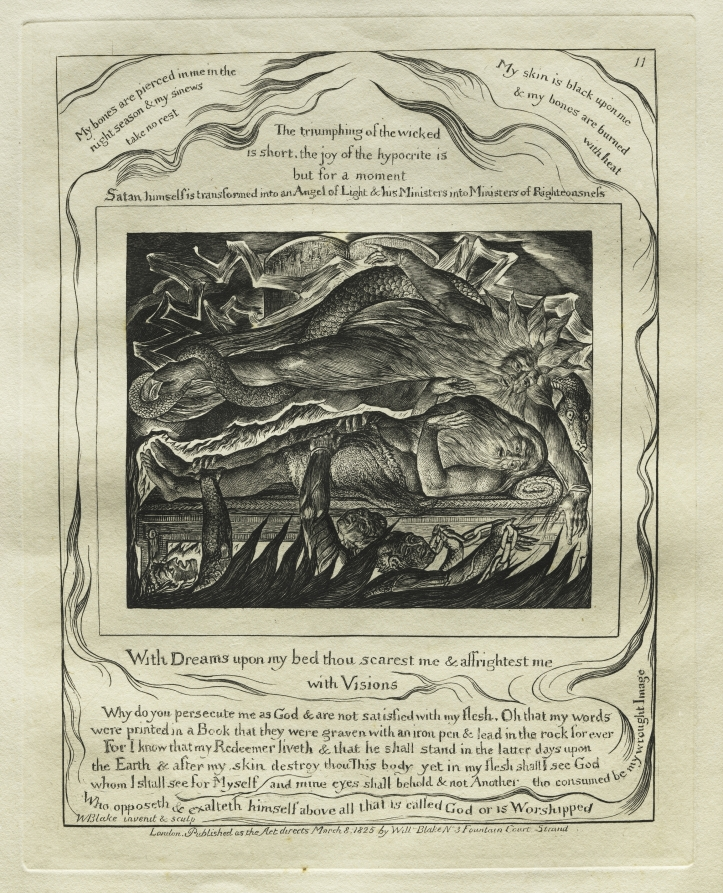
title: The Book of Job: Pl. 11, With Dreams upon my bed thou scarest me and affrightest me / with Visions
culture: England, 19th century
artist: William Blake (British, 1757–1827)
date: 1825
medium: engraving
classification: Print